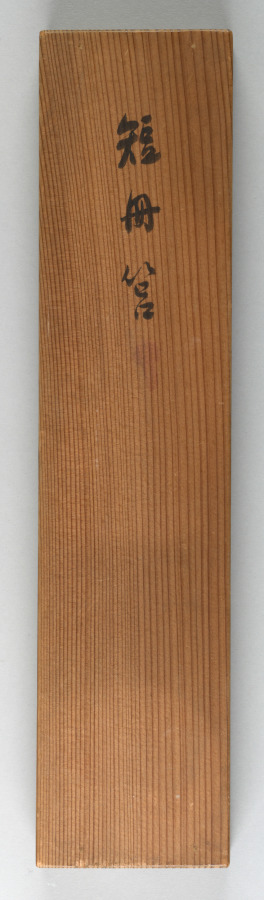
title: Poem Card Box with Lid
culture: Japan, Meiji period (1868–1912)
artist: Kamisaka Sekka (Japanese, 1866–1942)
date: 1868–1912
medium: wood with lacquer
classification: Lacquer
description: Long, decorated cards for the calligraphic presentation of poems are called tanzaku in Japanese. This box is a collaboration between the designer Kamisaka Sekka and the lacquer artist Iwamura Sadazō. Together, they crafted this box with a golden bamboo lid, and filled it with cards decorated with gold leaf designs.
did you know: Poems written on long poetry cards, or tanzaku, are often collected into albums called tekagami in Japanese.